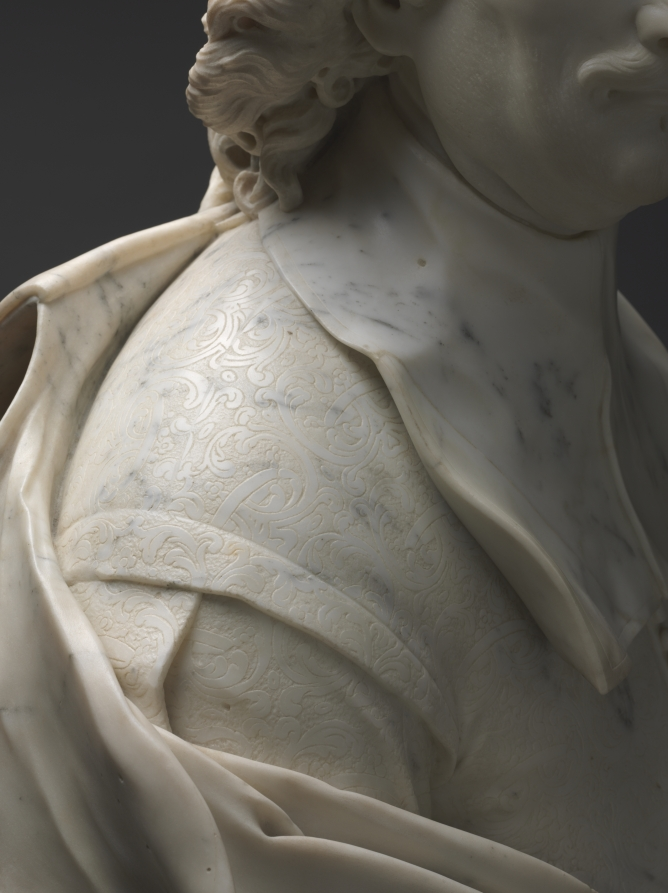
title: Portrait of Fabrizio Naro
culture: Italy, Rome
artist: Domenico Guidi (Italian, 1625–1701)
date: c. 1680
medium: marble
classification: Sculpture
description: This figure’s individualized facial expression, dynamic turn of the head and animated drapery are all characteristic of 17th-century Roman portrait sculpture. Guidi, a pupil of Alessandro Algardi, juxtaposed broad swaths of drapery and deeply drilled and carved hair with delicate surface detail, visible here in the patterning of the jacket and the faint suggestion of a beard. Based on a comparison with a later portrait on the family tomb in the church of Santa Maria sopra Minerva, Rome, the sitter has been identified as Fabrizio Naro (d. 1697), marquis of Mompei.